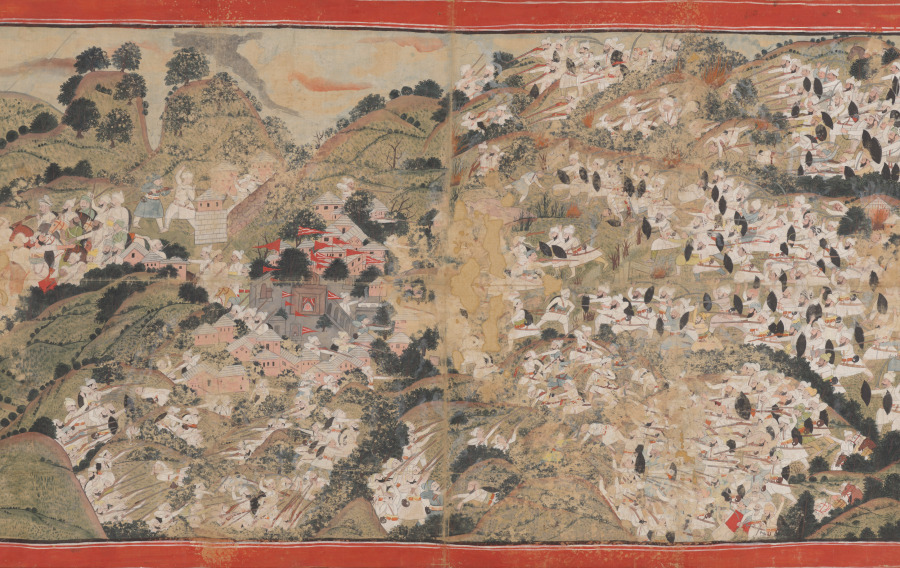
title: Raja Sansar Chand attacking Kangra Fort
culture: Northern India, Pahari kingdom of Kangra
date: after 1782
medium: Gum tempera, ink, and gold on cotton cloth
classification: Painting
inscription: Inscriptions in Takri and Persian. Persian reads: “On the 23rd of the month of Kartik, Samvat 1839 (1782 AD) Sri Maharaja Sansar Chand Bahadur attached Lakkarkot (Nagrakot ?) and the fortress of Kangra, attained victory and made siege intrenchments at the fortress of Kot Kangra.”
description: In 1782, the 17-year-old king of Kangra fought to retake his ancestral kingdom from the Mughals, who had controlled the territory since 1620. He rides a dark brown horse in front of the camel at the far right, blending in among his army and allies. The leftmost panel shows the residents of Kangra fleeing the conflict with their belongings on their heads to the safety of the fortress at the far left, from the walls where cannons are being fired. The main temple, built of gray stone, is in the middle of the composition, marked by red flags.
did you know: The king is 17 years old, beardless, riding a dark brown steed in front of the camel at the far right.